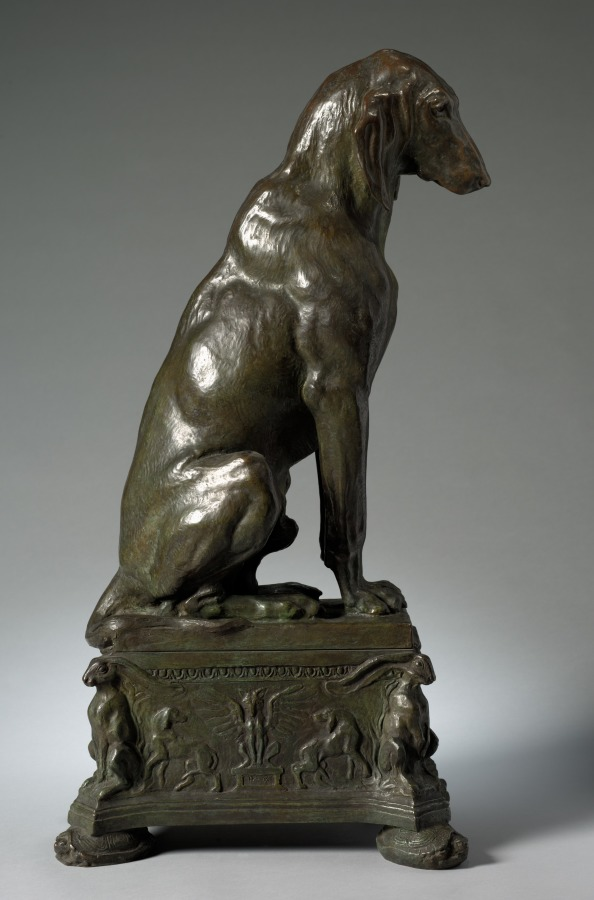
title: Hound (1 of 2)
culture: America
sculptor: Charles Cary Rumsey (American, 1879–1922)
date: 1912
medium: bronze andiron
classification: Sculpture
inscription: Signed on plinth: © C. C. Rumsey